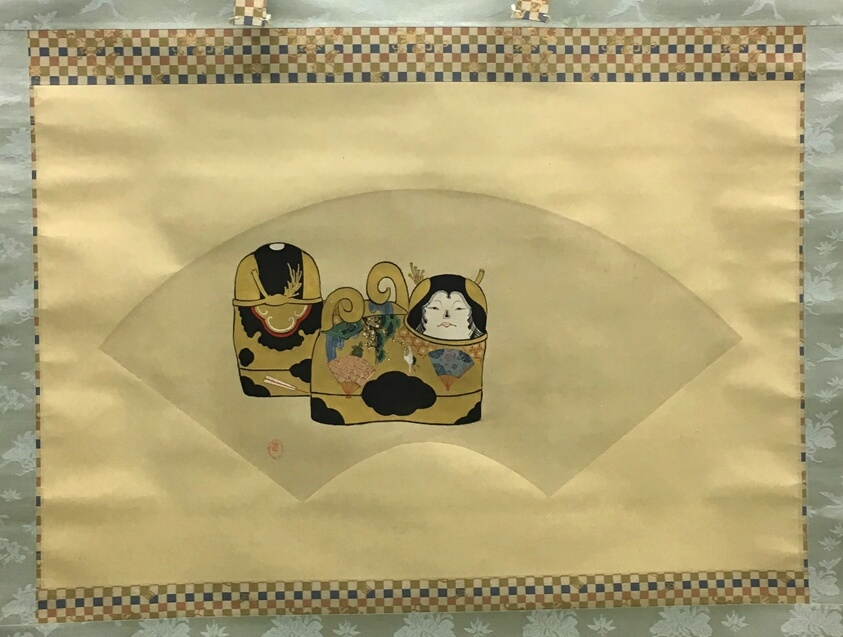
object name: Painting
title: Cat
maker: Shibata Zeshin (Japanese, 1807-1891)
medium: Hanging scroll; lacquer on paper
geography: Japan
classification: hanging scroll; painting; asian art